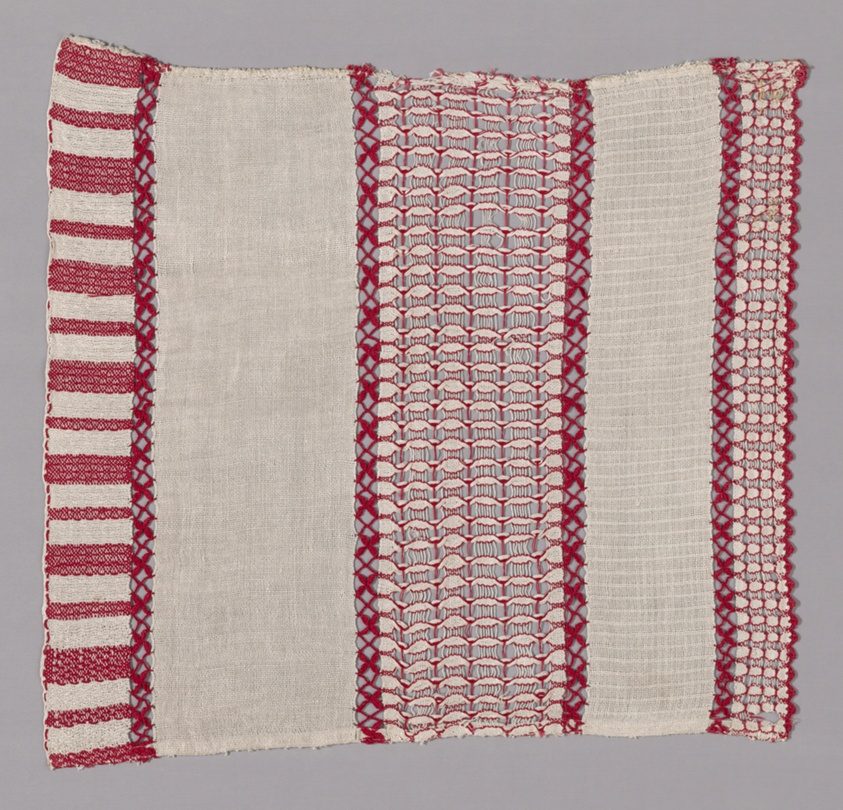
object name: Textile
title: Curtain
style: Modernism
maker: Designed by Elise Grill (German, active c. 1889–1890); Germany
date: 1889/90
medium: Linen and cotton, strips of: plain weave; plain weave with bands of weft floats; plain weave and alternating weft-float weave; plain weave, open work with crossed wefts; and plain weave, open work with knotted weft wrapping; joined with cotton, crochet and crocheted borders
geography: Germany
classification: textile; weaving